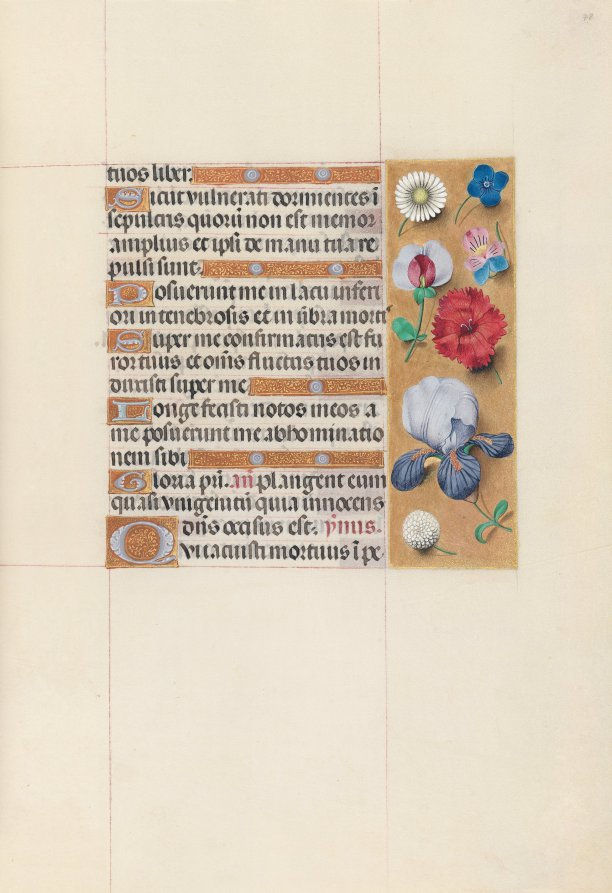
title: Hours of Queen Isabella the Catholic, Queen of Spain: Fol. 78r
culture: Flanders, Ghent and Bruges, late 15th century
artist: Master of the First Prayerbook of Maximillian (Flemish, c. 1444–1519)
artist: and Associates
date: c. 1500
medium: ink, tempera, and gold on vellum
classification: Bound Volume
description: This manuscript was illuminated by a circle of at least five highly organized manuscript painters active in the Flemish cities of Ghent and Bruges. The principal illuminator was Alexander Bening, who painted the majority of the book's miniatures. Manuscripts produced by this circle of artists are renowned for the decoration of their borders, which typically feature a rich variety of realistically-painted flowers, birds, and butterflies. This prayer book, called a book of hours, was intended not for a cleric, but for the private devotions of a lay person-in this case, Isabella the Catholic, Queen of Spain (1451-1504). Isabella's coat of arms embellishes the book's frontispiece. It is unlikely that the book was commissioned by the Queen herself; rather, she probably received it as a diplomatic gift from someone courting her patronage, perhaps Cardinal Francisco Jimenez de Cisneros. A Franciscan friar, Jimenez was dependent upon Isabella for his advancement, first to the post of Queen's confessor in 1492, and then to Archbishop of Toledo in 1495.